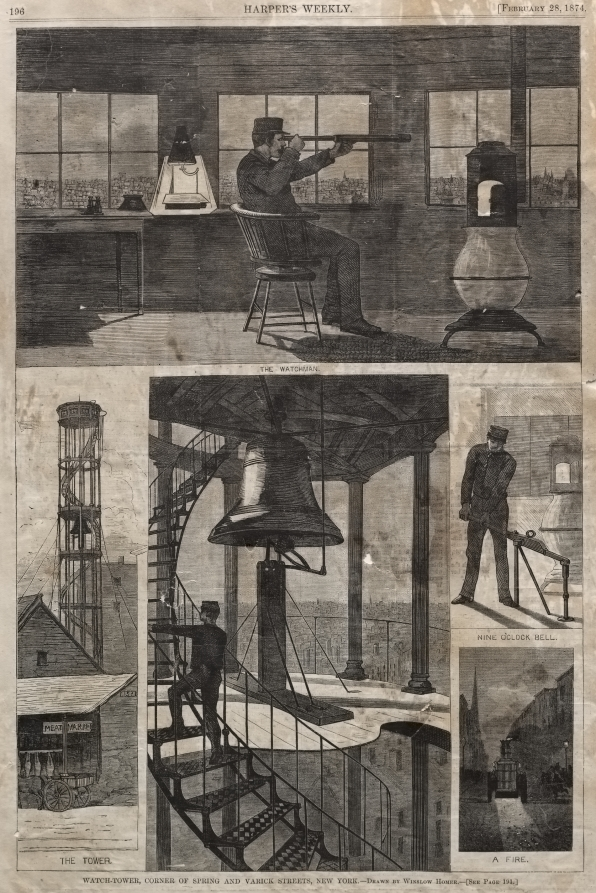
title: Watch-Tower, Corner of Spring and Varick Streets, New York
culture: America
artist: Winslow Homer (American, 1836–1910)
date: 1874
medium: wood engraving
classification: Print